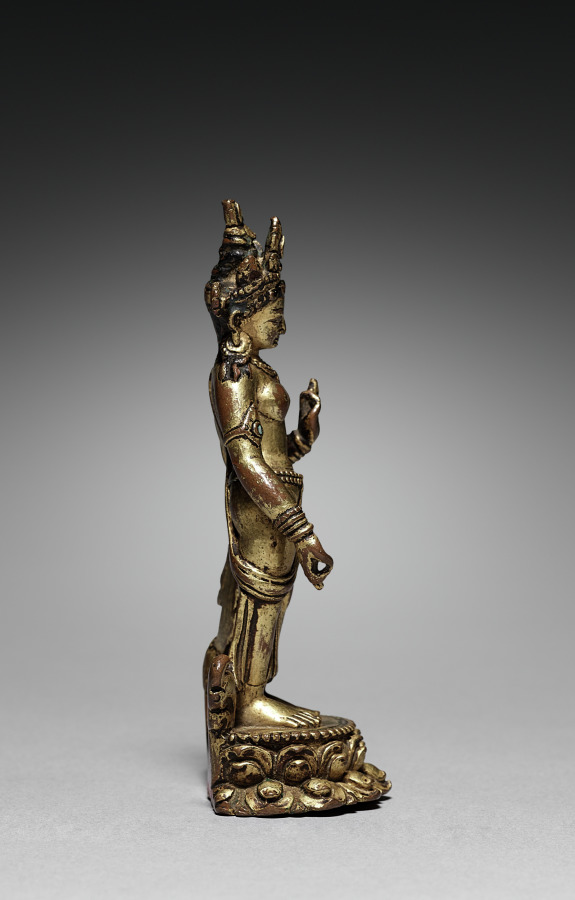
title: Standing Tara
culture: Nepal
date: 1300s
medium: bronze, gilded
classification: Sculpture